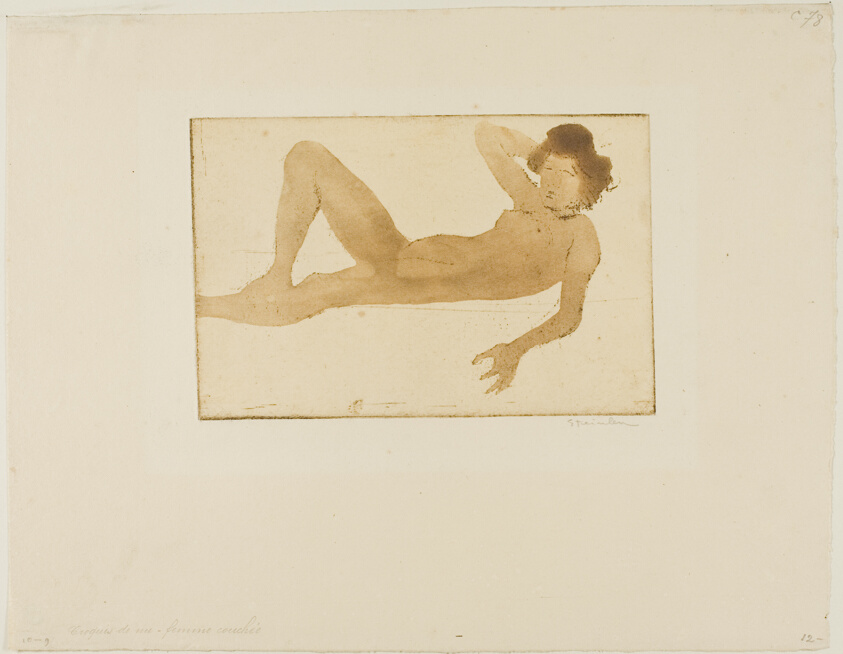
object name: Print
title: Reclining Woman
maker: Théophile-Alexandre Steinlen; French, born Switzerland, 1859-1923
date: 1902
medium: Aquatint and soft ground etching from a zinc plate in bistre (brown) on ivory wove paper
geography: France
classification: etching; print; prints and drawing